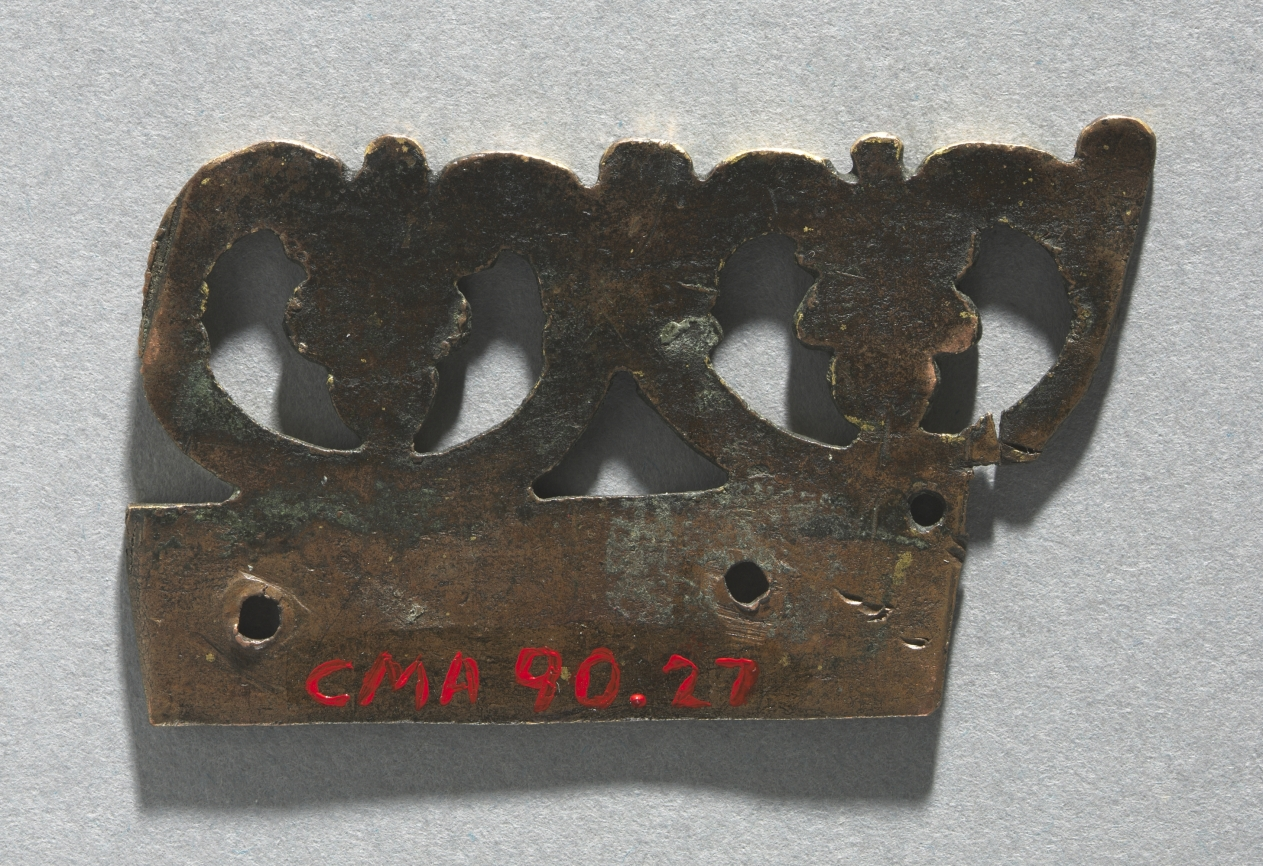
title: Fragment of an Ornamental Crest from a Reliquary Shrine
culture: Mosan, Meuse Valley, Maastricht?, Gothic period, 12th century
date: c. 1165–1180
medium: gilded copper, émail brun (brown enamel)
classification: Metalwork